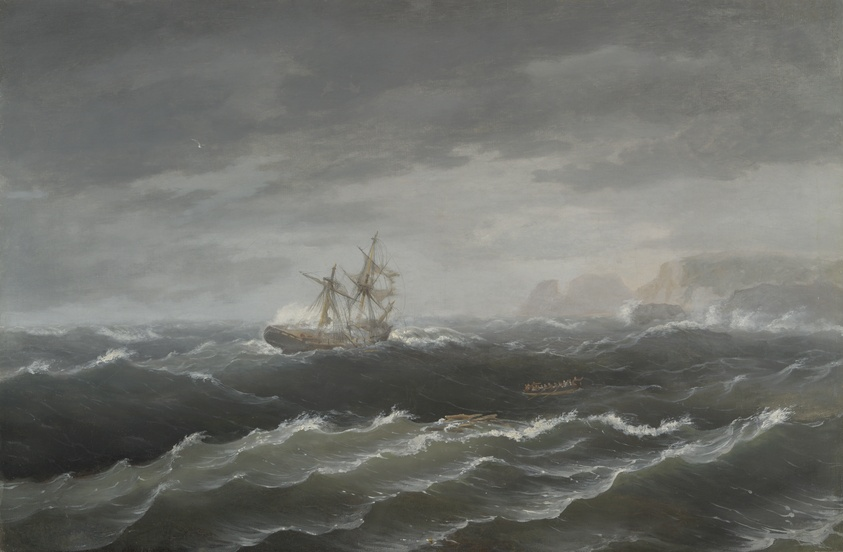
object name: Painting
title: Shipwreck near a Rocky Coast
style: 19th century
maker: Thomas Birch (American, born England, 1779–1851)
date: 1833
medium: Oil on canvas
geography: United States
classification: painting; oil on canvas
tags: landscapes, boats